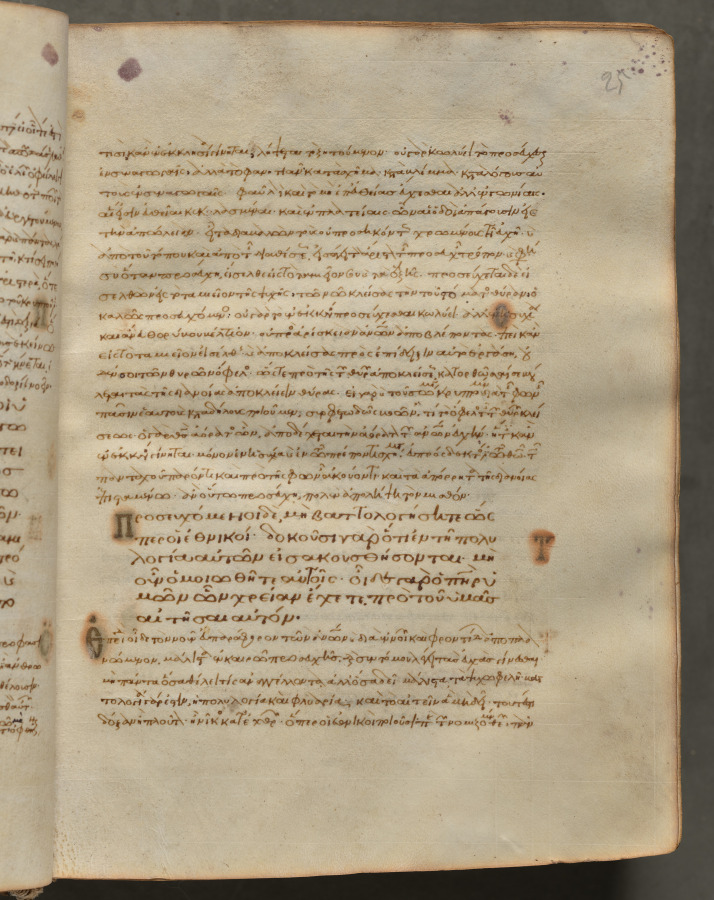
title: Text, folio 25 (recto), from a Gospel Book with Commentaries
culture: Byzantium, Constantinople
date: c. 1000–1100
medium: ink, tempera, and gold on vellum; leather binding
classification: Bound Volume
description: Each of the four gospels in this book opens on a page with brilliantly illuminated borders depicting the author of the text as well as birds-principally peacocks, symbols of the immortality of the soul-and fountains, representing the fountain of life and the salvation of the soul. This volume consists of 428 leaves with texts in Greek. Its level of sophistication suggests that it was probably written and decorated in a monastery in Constantinople.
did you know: Gospel Books were carried in procession through Byzantine churches.